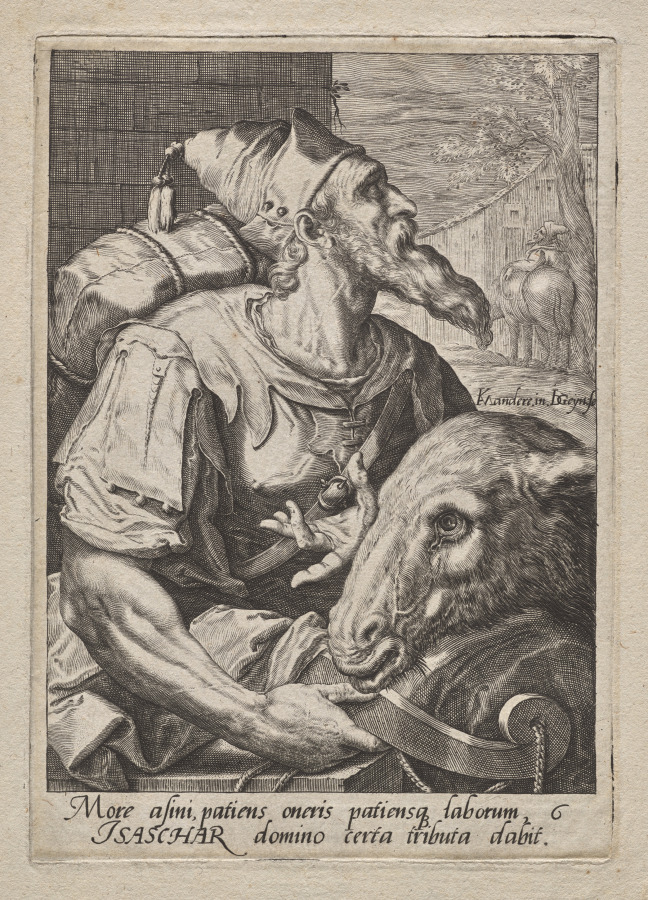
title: Plate 6: Isaachar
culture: Netherlands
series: The Twelve Sons of Jacob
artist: Jacob de Gheyn II (Netherlandish, 1565–1629)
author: after Karel I van Mander (Netherlandish, 1548–1606)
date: c. 1589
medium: engraving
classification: Print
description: In this print, the biblical figure Isaachar holds a rucksack while accompanied by a donkey, denoting his destiny to serve and perform hard labor. This is one of a series of prints depicting the twelve sons of Jacob, each with an attribute and costume that denotes his character. According to the Old Testament, Jacob blessed each of his twelve sons, prophesizing the destiny of their tribe, and assigning them a parcel of land in Canaan. The print series was made in the Netherlands in the late 16th century, a time of political struggle when Old Testament heroes were popular exemplars of fortitude and patience.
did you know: The rucksack carried by this Old Testament figure suggests his perpetual travel while the donkey denotes his employment as a laborer.